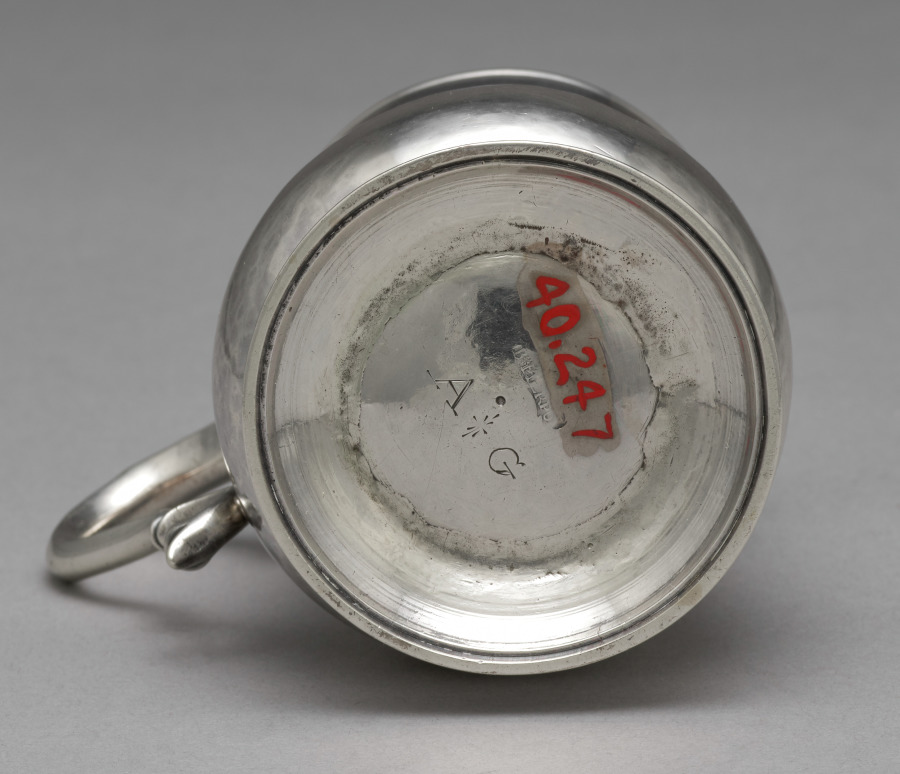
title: Cann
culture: America, Massachusetts, Boston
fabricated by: Benjamin Pierpont (American, 1730–1797)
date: c. 1760–70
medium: silver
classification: Silver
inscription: engraved "A*G" in block letters on bottom.